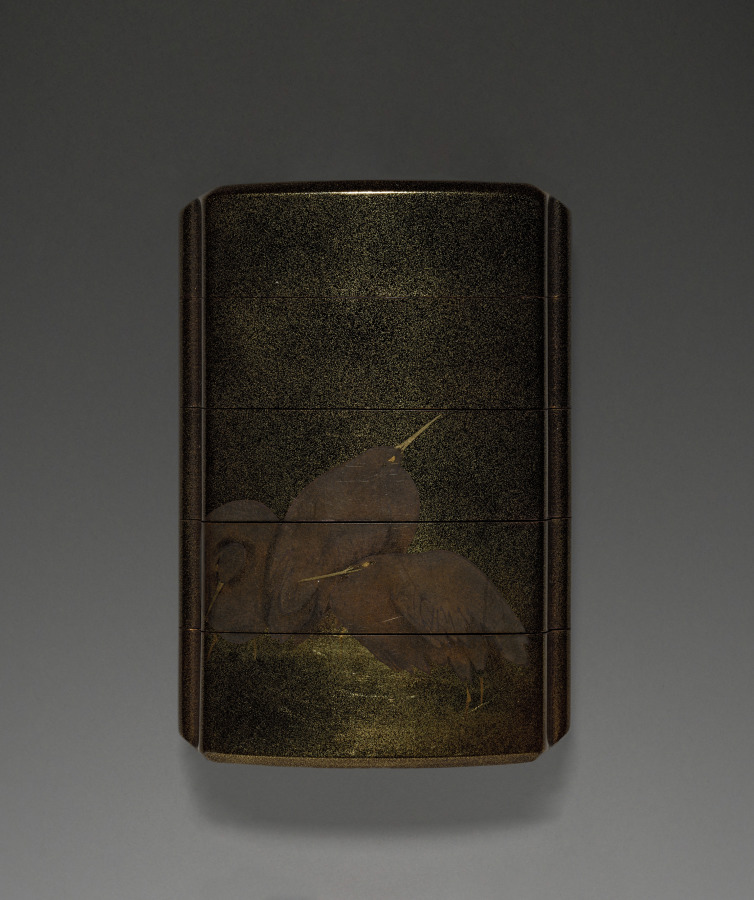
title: Inrō with Crows in Moonlight and Egrets in Snow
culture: Japan, Edo period (1615–1868)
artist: Koma Kyoryū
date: c. 1772–89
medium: Lacquered wood with sprinkled gold (maki-e)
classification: Lacquer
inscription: Signed: 古満巨柳作（花押）